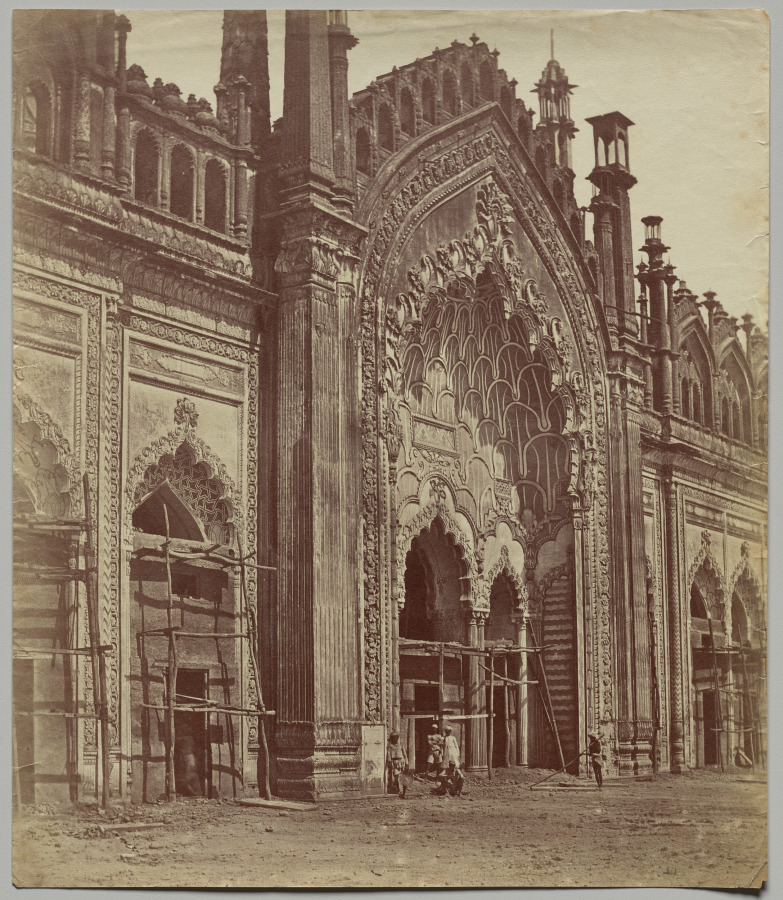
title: Jama Masjid Gate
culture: England, 19th century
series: Lucknow After the Siege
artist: Felice A. Beato (British, 1832–1909)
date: 1858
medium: albumen print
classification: Photograph